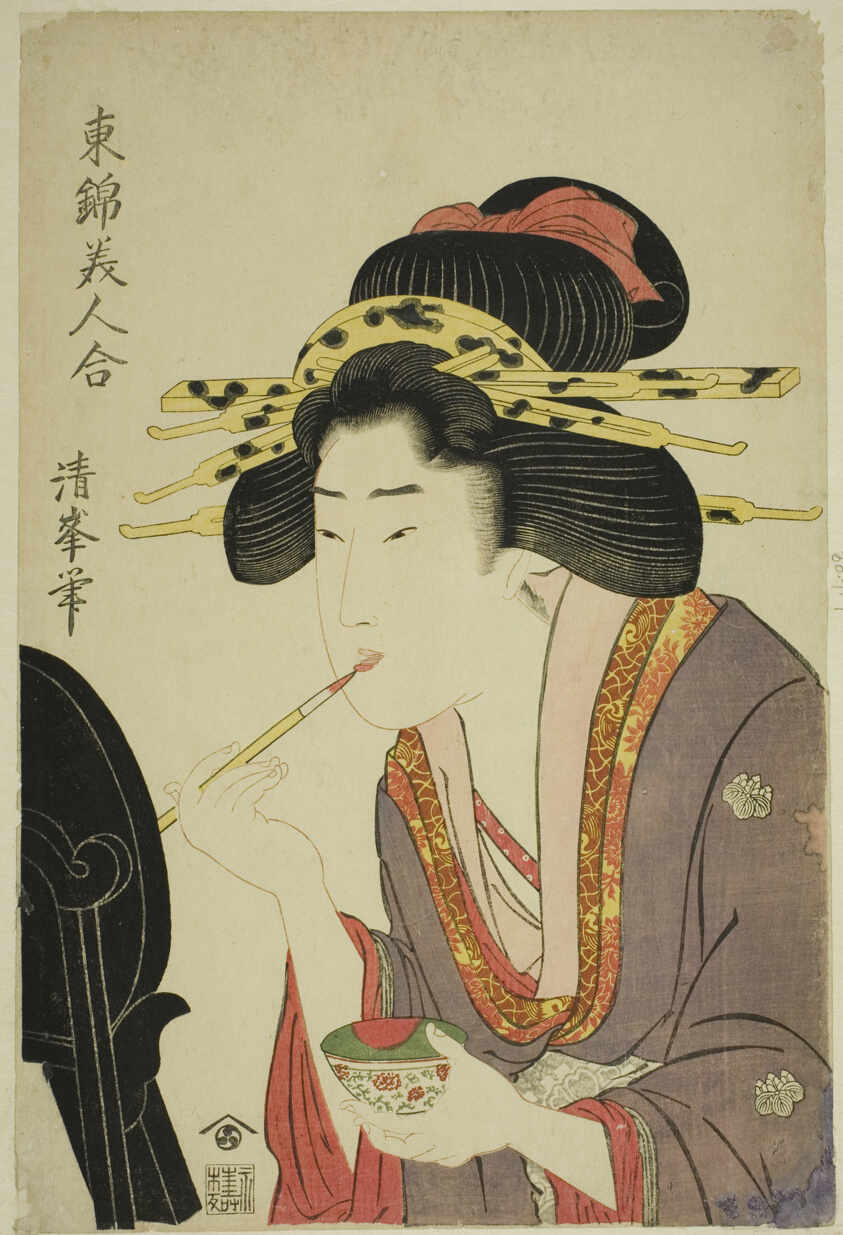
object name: Print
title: Beauty applying rouge, from the series "Comaprison of Beauties in Eastern Brocade (Azuma nishiki bijin awase)"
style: Japanese (culture or style)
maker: Torii Kiyomitsu II (Kiyomine) (Japanese, 1787–1868)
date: c. 1804/10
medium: Color woodblock print; oban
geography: Japan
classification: woodblock print; print; asian art